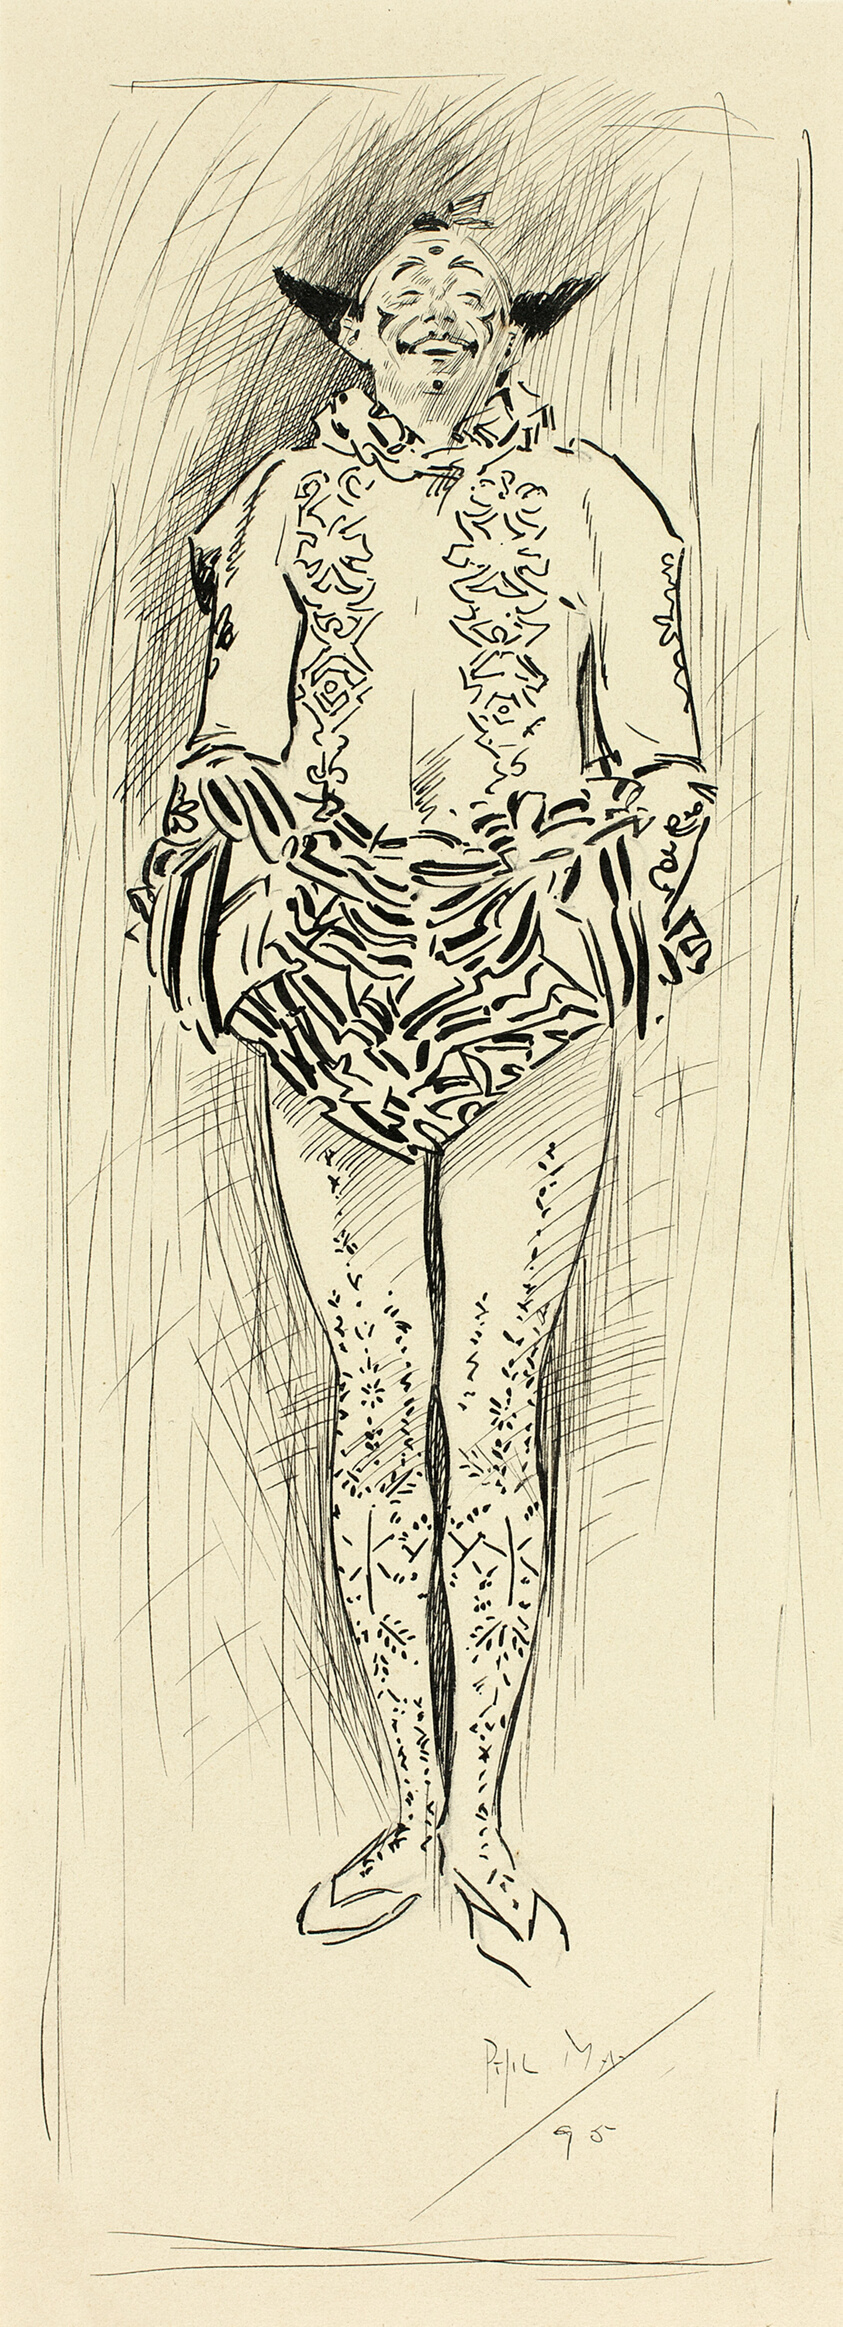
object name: Drawing and Watercolor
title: Pierrot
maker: Philipp William May; English, 1864-1903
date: 1895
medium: Pen and black ink over traces of graphite on buff wove card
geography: England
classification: pen and ink drawings; drawings (visual works); prints and drawing